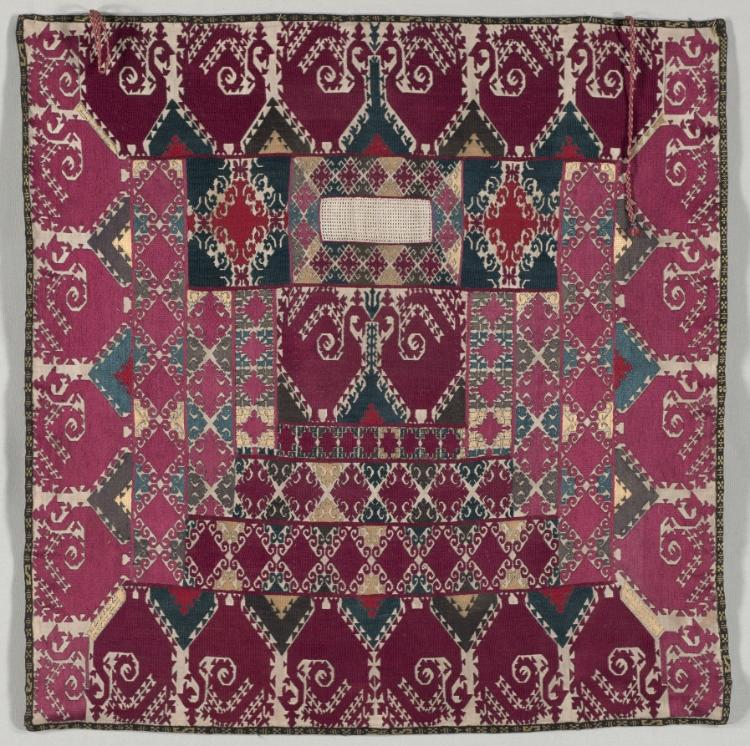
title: Wedding Veil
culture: Tajikistan, Tajik tribe, 19th century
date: 1800s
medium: silk, cotton, embroidery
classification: Textile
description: Brides traditionally concealed their faces during their weddings and afterward as newly married women and on special occasions. This elaborate type, which includes a cotton netting rectangle that permitted vision, was only worn by Tajik Turkmen. The decoration features motifs that can be interpreted as birds or palmette leaves in a style that characterizes early Islamic art and that may have originated in Iran.